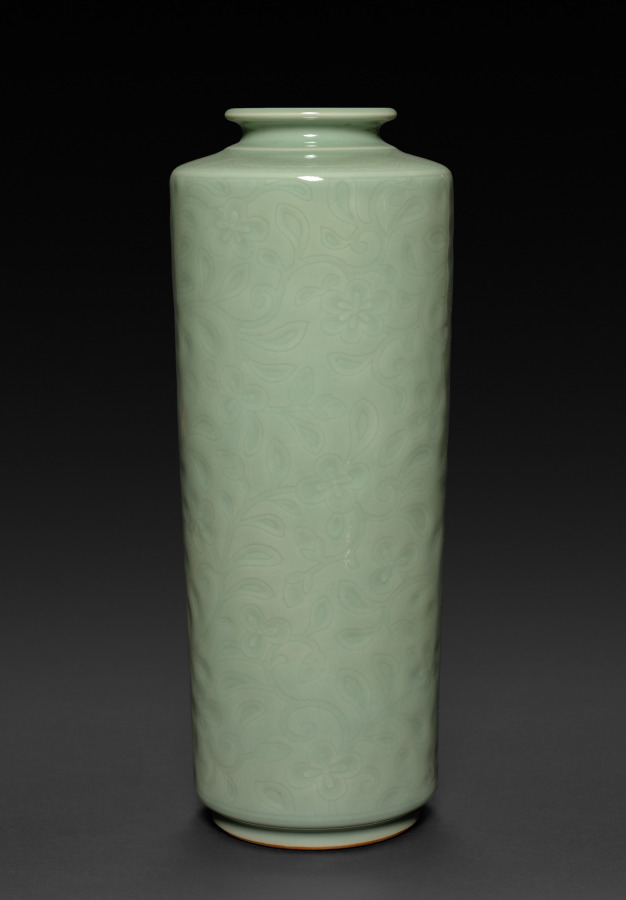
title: Tong-Shaped Vase with Flowers and Grasses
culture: Japan, Taishō period (1912–26) or Shōwa period (1926–89)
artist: Seifū Yohei IV (Japanese, 1872–1951)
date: 1914–46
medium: Porcelain with molded and carved design and green glaze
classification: Ceramic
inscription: 清風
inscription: 彫画 / 青磁花瓶 / 清風造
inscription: 青磁花瓶 / 彫画 【印】清風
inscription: 清風造 【印】成山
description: Many of the vases created by Yohei III and IV were made with reference to and in emulation of Chinese ceramics in both form and glazing. The vessel type called tongping, pronounced tōbin in Japanese, is tall and cylindrical, like the thick length of bamboo referenced in the shape of the ideograph tong 筒. Unlike the ancient gu, hu, and guan, this form did not emerge in China until the Ming dynasty, and many such vases date to the early Qing dynasty. Two green-glazed vases, CMA 2022.225 by Yohei III and this one by Yohei IV, are interpretations of this form. Yohei III’s version has slightly hunched shoulders and is somewhat wider at the top below the small neck and lip. Yohei IV’s vase is more angular. The wide rack of molded cloud encircling the Yohei III vase rises subtly from very low relief banding above and below it, accentuating the vessel’s rounded edges and complementing the form. In contrast, the allover flower vine pattern on the body and “seven treasures” pattern at the collar of the vase by Yohei IV evokes a garment’s cuffed sleeve, like the common English appellation for this type of vessel—“sleeve vase.”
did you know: Seifū Yohei IV continued to create works in the studio’s signature colors but also produced pieces with strong color and flare that were his interpretations of Qing dynasty (1644–1911) glazes.